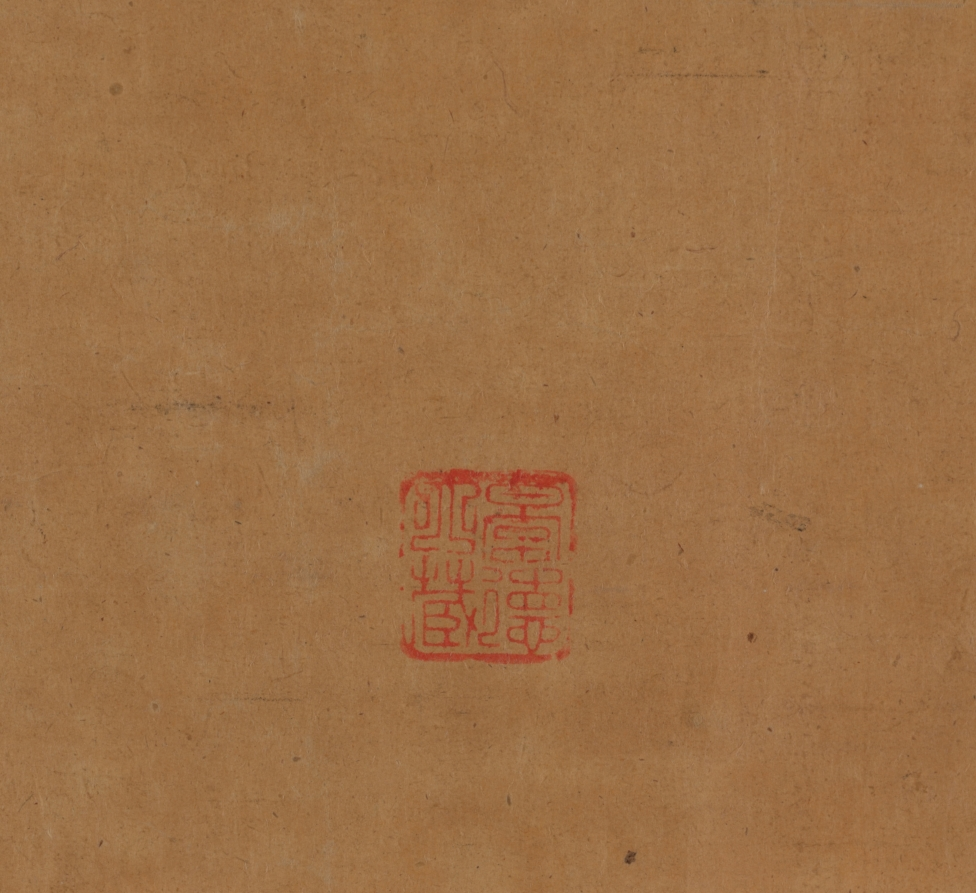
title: Zhao Mengfu Writing the Heart (Hridaya) Sutra in Exchange for Tea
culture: China, Ming dynasty (1368–1644)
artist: Qiu Ying (Chinese, 1494–1552)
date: 1542–43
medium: handscroll, ink and light color on paper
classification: Painting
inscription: Inscription accompanying text of "Heart" sutra, by Wen Zhengming 文徵明 (1470-1559): Zhengming 徵明, written in a boat at Kunshan 崑山, on the twenty-first day of the ninth month, in the renyin 壬寅 year, the twenty-first year of the Jiajing era [1542].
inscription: Colophon by Wang Shih-mou: Chou Yü-shün [Feng-lai] of K'un-shan was a scholarly, refined connoisseur of antiquities. He had acquired the poem written by Chao Ch'eng-chih [Chao Meng-fu] about the exchage of tea for Chao's calligraphy of the Prajna sutra. But the sutra itself, also written by Chao Meng-fu, is lost. He therefore asked Ch'iu Shih-fu [Ch'iu Ying] to do a painting and had Wen Cheng-ming, the artist-in-attendance, write the Hridaya Sutra in the "small, regular" style for replacement. Both works are so excellent that even Chao Meng-fu himself would certainly applaud if he should be reborn to see them. I, Shih-mou, had gotten possession of this scroll from the family of Chou Yü-shün, and since it was so wonderfully matched with one of the treasures in my collection. the Hridaya Sutra written by Chao Meng-fu for Priest Li in "running script," like the reuniting of two halves of a jade pi, I completed the scroll with the several colophons written for the "tea-exchange" poem. I did this because the painting of Ch'iu Ying and the calligraphy of Wen Cheng-ming are definitely masterpieces by themselves with absolutely no need to depend on any of the colophons written for the Chao Meng-fu poem. Furthermore, the two sons of Wen Cheng-ming, Shou-ch'eng [Wen P'eng] and Hsiu-ch'eng [Wen Chia]. have each written a colophon explaining the reason for replacing the calligraphy. As their writings are both acceptable for high standard, I didn't want to throw them away. [So by separating these into two scrolls] I was able to get two complete works of art in one clever stroke. I was quite pleased with myself, and hope that those who see this scroll shall not get suspicious because of the missing colophons. Wang Shih-mou wrote in his Jih-sun-chai study, on the first day of the tenth month, in the chia-shen year of the Wan-li era [1584].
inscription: Colophon by Wen P'eng: I-shao [Wang Hsi-chi] wrote in exchange for a flock of geese. Su Tung-po wrote in exchange for meat. Both episodes have become legends of a thousand years. Sung-hsüeh [Chao Meng-fu] "teased" Priest Kung for tea, and the story was immediately immortalized in the poems by all the famous scholars of the times. Indeed, how could one say his humor and elegance are not equal to the ancient worthies? Unfortunately, the poetry has survived but the writing of the sutra is lost. Yü-shün [Chou Feng-lai] therefore asked my father to make up the writing and so here is the complete work of art. Respectfully inscribed by Wen P'eng in the mid-summer of 1543.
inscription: Colophon by Wen Chia: Sung-hsüeh [Chao Meng-fu], in exchanging tea leaves for his writing of the Prajna, had put himself in the company of Yu-chün [Wang Hsi-chih] who exchanged geese for his writing of the Huang-t'ing sutra [the Yellow Chamber, or the Wai-ching ching, a Taoist text attributed to the Yellow Emperor]. However, was this romantic and cultivated gesture really intended for such small things? Actually, he was only proud that the excellence of his calligraphy had made him worthy to be the successor of the Ch'in Dynasty master. Since, very unfortunately, Chao Meng-fu's writing [of the Prajna] was already lost, my father therefore agreed to replace it, and did the calligraphy in the style of the Yellow Chamber. In addition, Yu-shün [Chou Feng-lai] had asked Mr. Ch'iu Shih-fu [Ch'iu Ying] to do a painting of the sutra writing story in the style of Li Lung-mien at the head of the scroll. Now it would seem the entire episode should go down in history for immortality. Respectfully recorded by Wen Chia, on the eighth day of the eighth month, in the year of k'uei-mao [1543]. trans. WKH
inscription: 4 colophons and 23 seals: 1 colophon, dated 1543, and 2 seals of Wen Peng (1498-1573); 1 colophon, dated 1543, and 2 seals of Wen Chia (1501-1583); 1 colophon, dated 1584, and 3 seals of Wang Shih-mou (1536-1588); 2 seals of Chou Feng-lai (16th c.); 3 seals of Sung Lo (1634-1713); 5 seals of the Ch'ien-lung emperor (r. 1736-95); 1 colophon, dated 1902, and 1 seal of Fei Nien-tz'u (1885-1905); 4 seals of Wan-go H. C. Weng (b. 1918); 1 seal unidentified.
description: The Yuan dynasty calligrapher Zhao Mengfu (1254–1322) is said to have transcribed the Heart Sutra for a certain priest named Li in exchange for tea. Later, during the Ming dynasty, the professional painter Qiu Ying from Suzhou painted this scene for his patron. Here, Zhao Mengfu holds a brush and has a piece of paper laid out before him. On the table is an ink stone, an ink stick, and a small water dropper. Drops of water would dissolve the ink stick into liquid ink when it was ground on the flat square stone.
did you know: Qiu Ying was born to a peasant family, but his natural talent led him to a successful career as a professional painter with wealthy patrons.